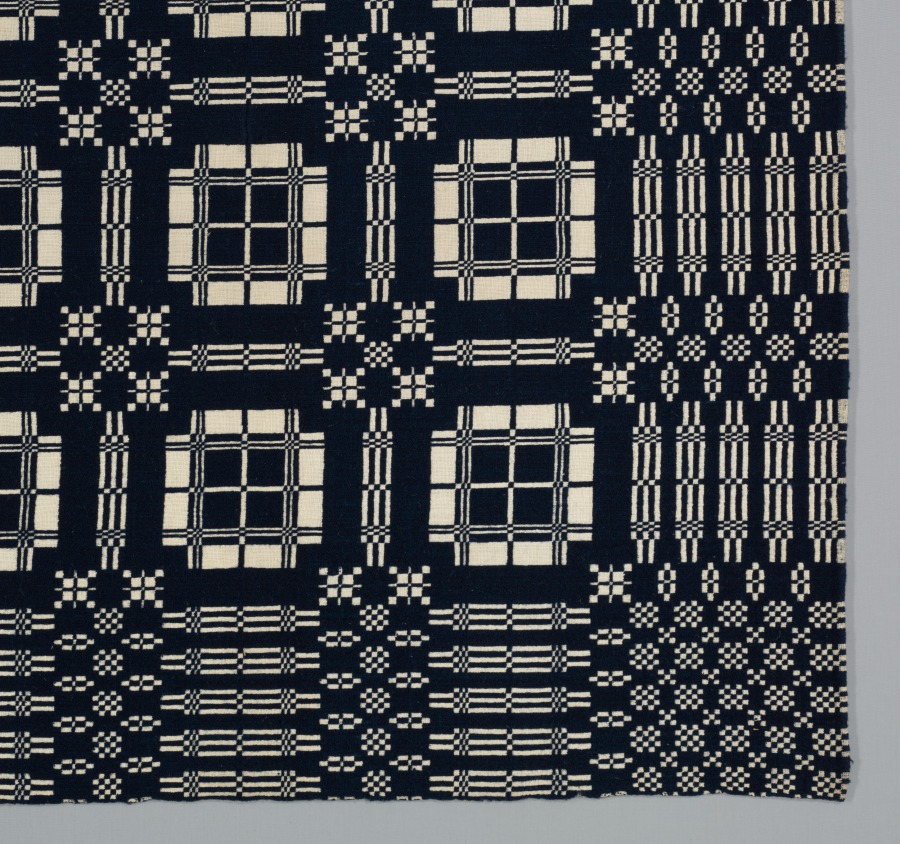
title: Coverlet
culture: America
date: 19th century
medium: wool and cotton; double cloth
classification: Textile